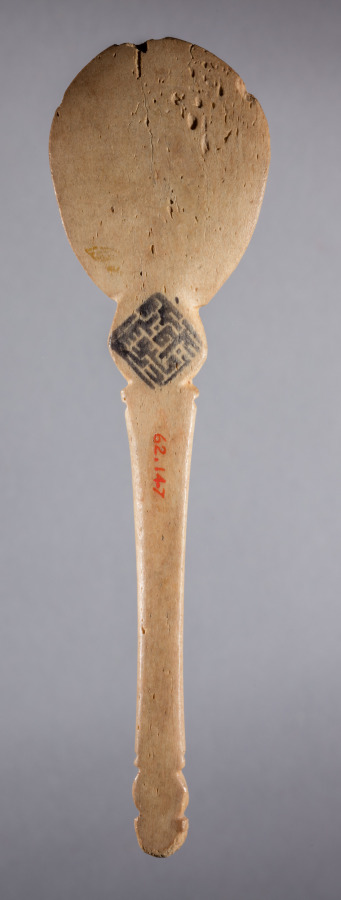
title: Bone Object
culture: Iran, early Islamic period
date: 700s - 900s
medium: bone, incised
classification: Miscellaneous